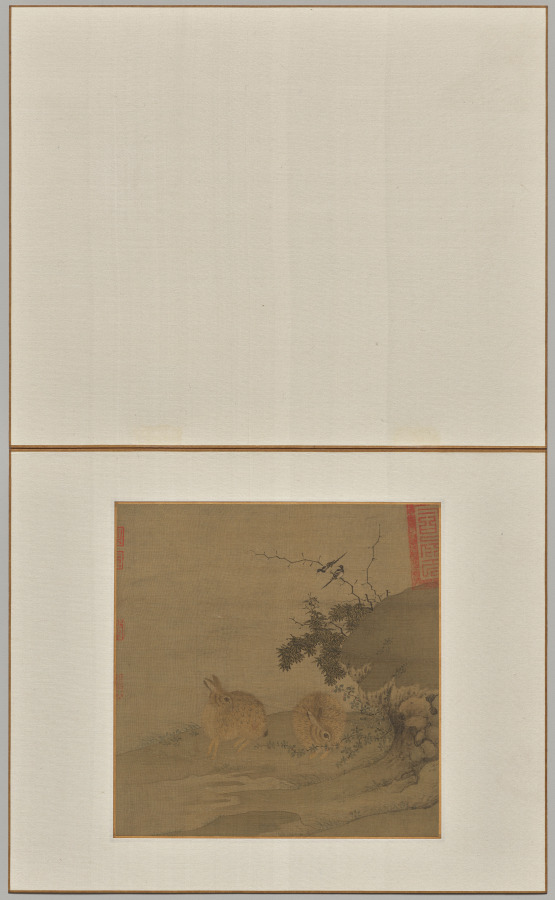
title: Magpies and Wild Rabbits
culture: China, Song dynasty (960-1279)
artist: Li Yong (Chinese, active 1200s)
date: 1200s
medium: album leaf, ink and light color on silk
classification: Painting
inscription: 1 official seal of Ming Dynasty.